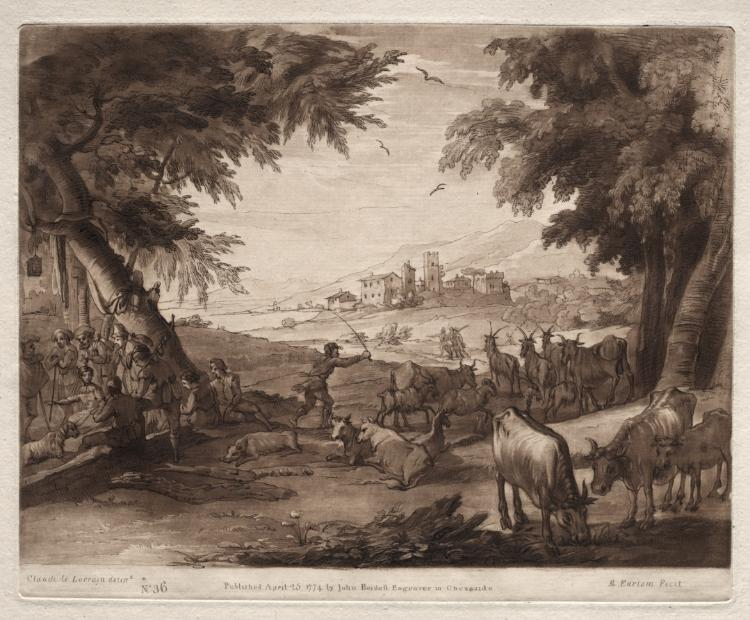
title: Liber Veritatis: No. 36, Pastoral Scene with Villagers and a Herd of Oxen and Goats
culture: England, 18th century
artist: Richard Earlom (British, 1743–1822)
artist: after Claude Lorrain (French, 1604–1682)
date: 1777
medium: etching and mezzotint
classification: Print